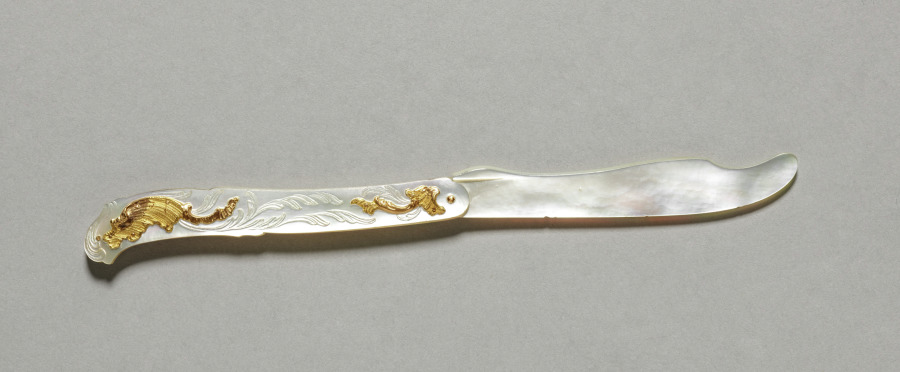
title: Paper Knife from a Sewing Box (Nécessaire)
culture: Austria, possibly Vienna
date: c. 1765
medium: gold and mother-of-pearl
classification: Miscellaneous